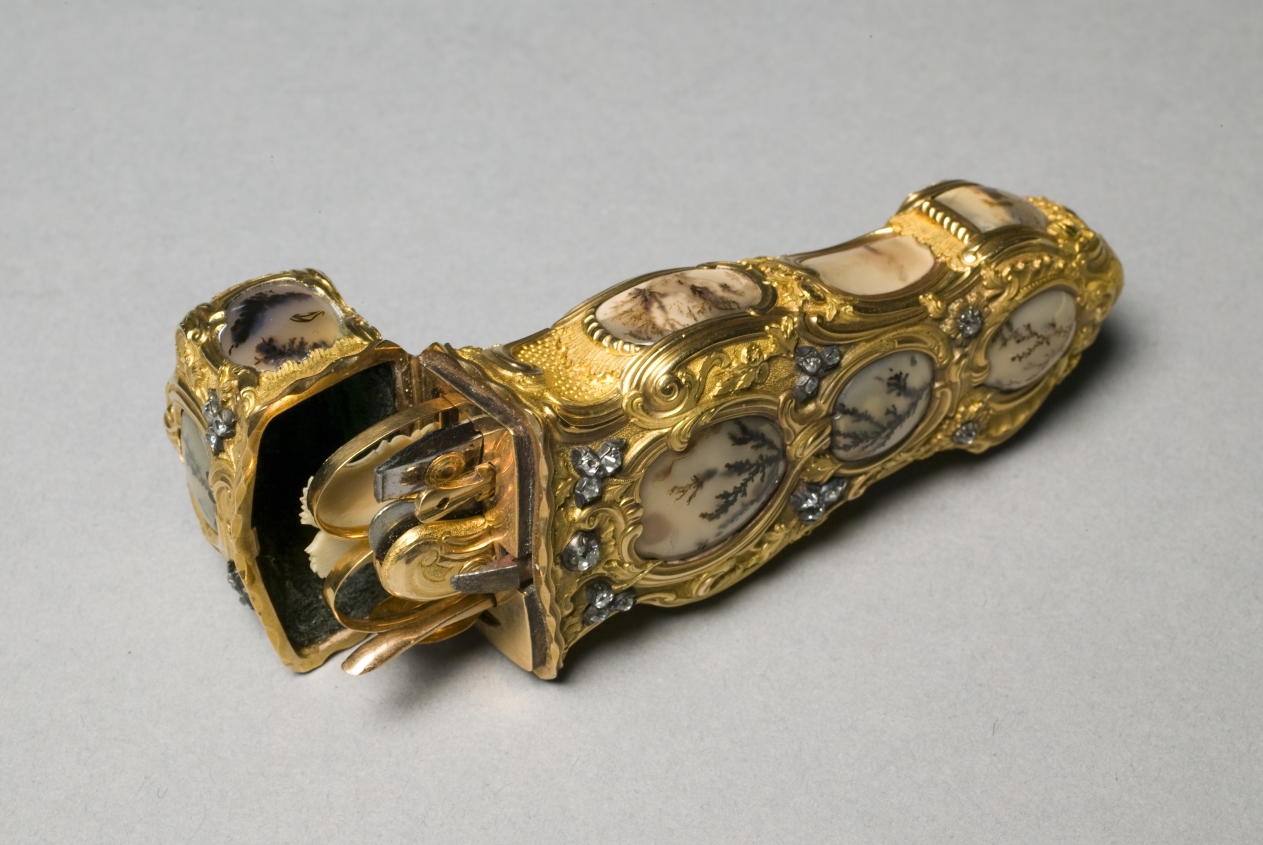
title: Vanity Case (Etui)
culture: England, 18th century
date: c. 1750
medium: gold, agate. diamonds, interior fitted with implements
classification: Miscellaneous